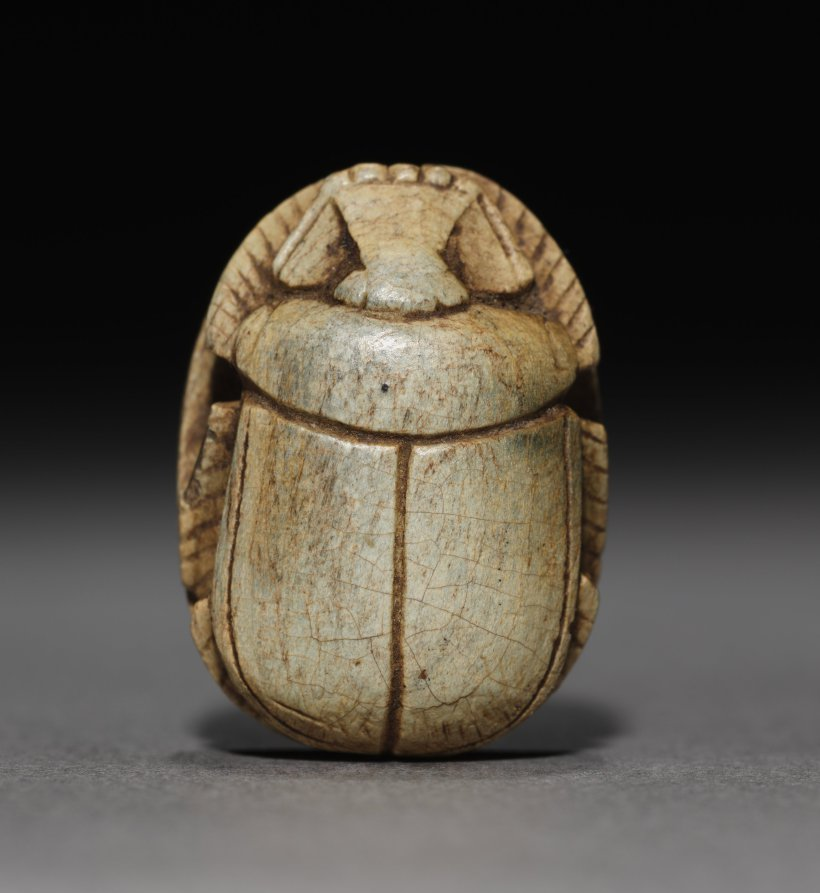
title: Scarab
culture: Egypt, Modern forgery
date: 1900–1914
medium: steatite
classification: Scarabs